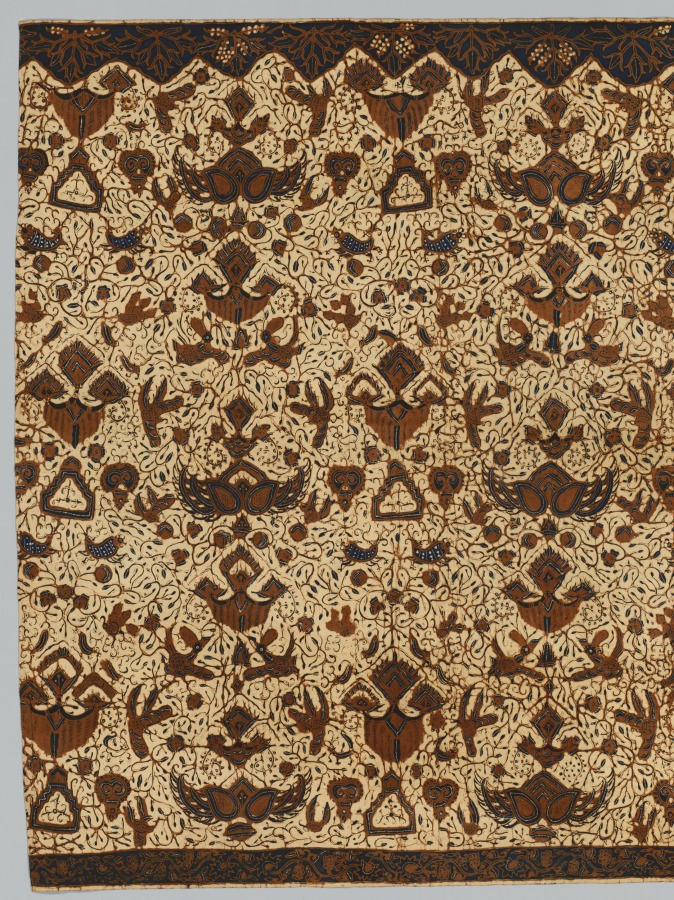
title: Wearing Cloth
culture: Indonesia, Central Java, 19th century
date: 1800s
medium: batik; cotton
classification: Textile